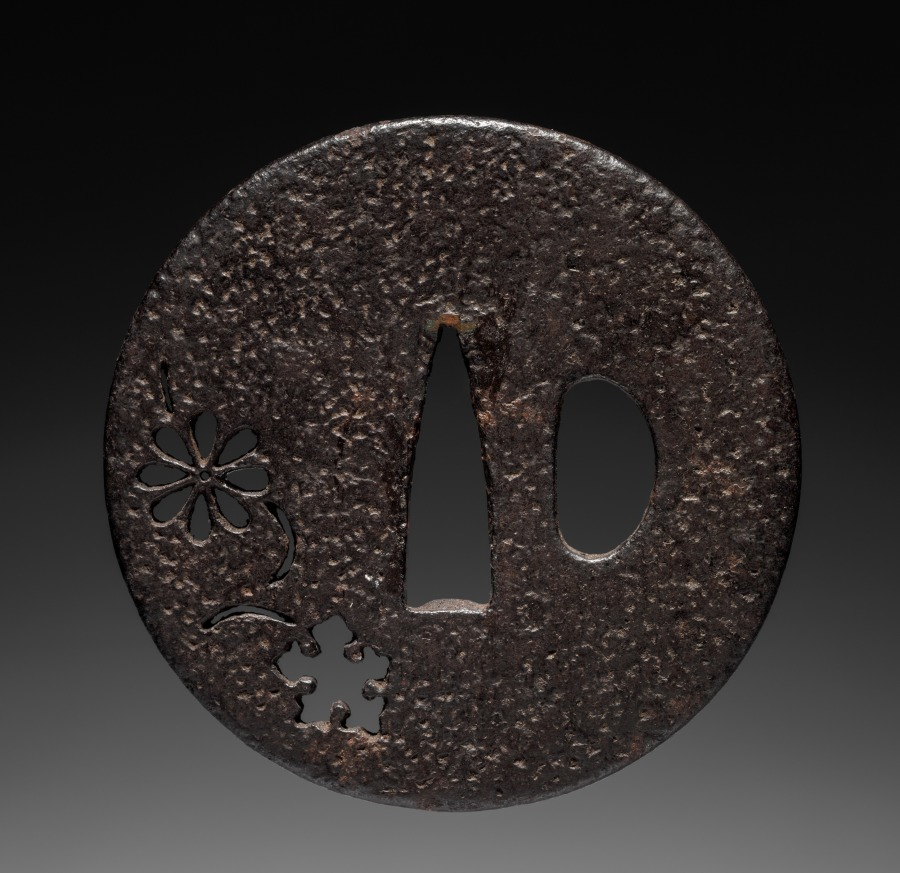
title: Sword Guard (Tsuba) with Flower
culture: Japan, possibly Edo period (1615-1868)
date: c. 1615–1868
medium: iron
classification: Arms and Armor